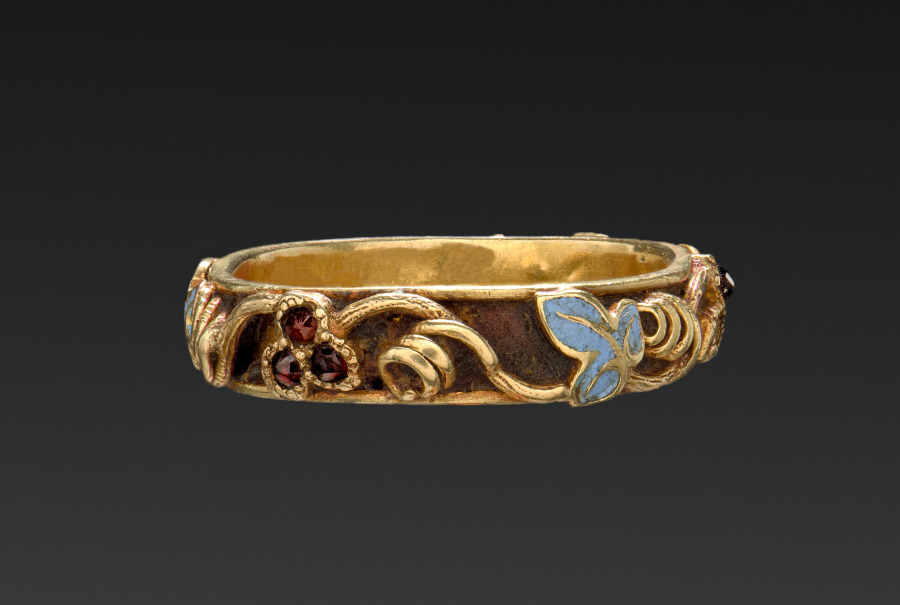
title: Ring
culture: France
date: c. 1850–75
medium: gold, garnet, and enamel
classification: Jewelry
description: Although this ring was made in the late Renaissance style featuring rough-cut gemstones, the trailing vines and the popularity of revival styles in the mid-19th century suggest that it was made in the later period.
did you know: Garnets were very popular in jewelry of the mid-19th century.